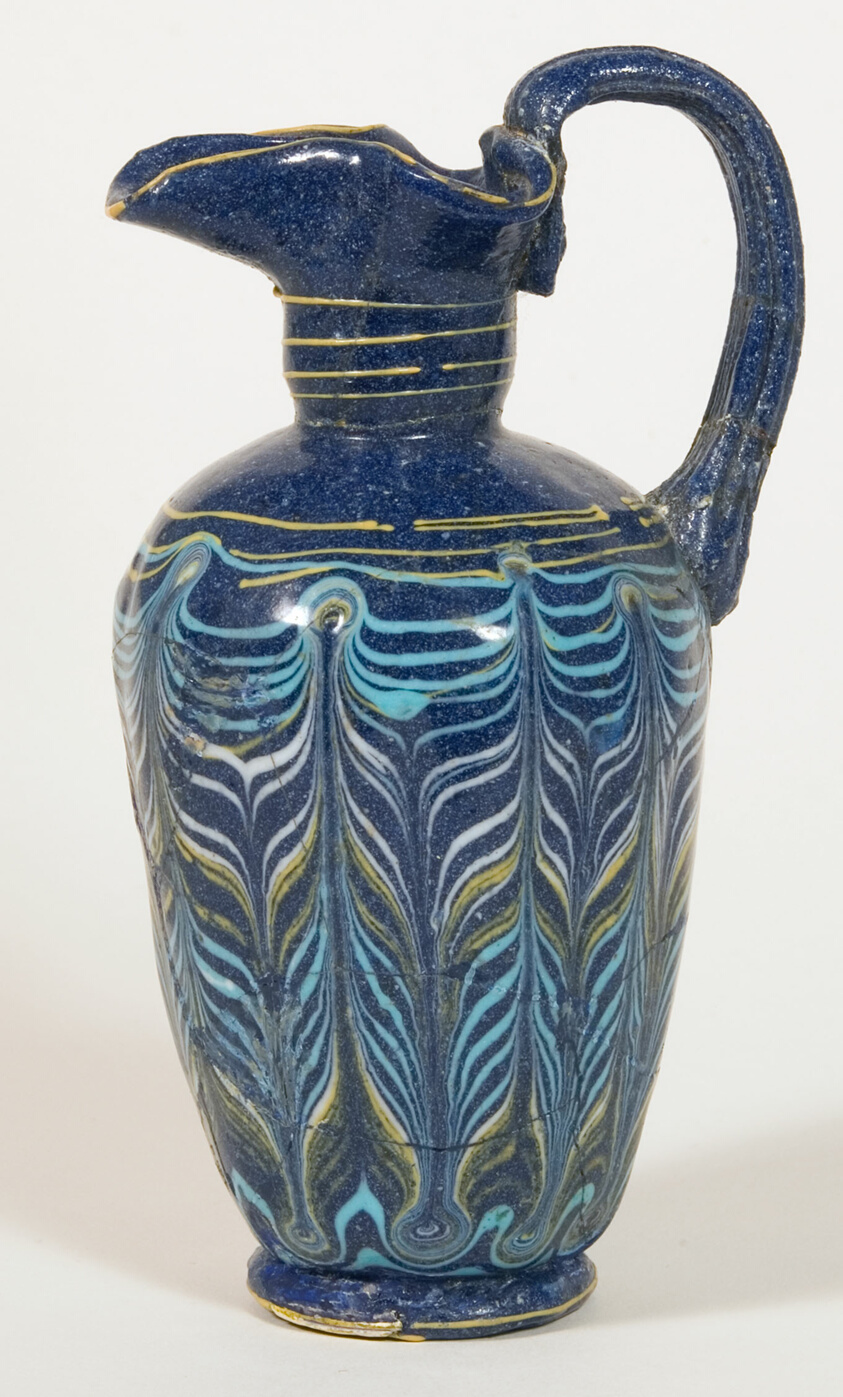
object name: Vessel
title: Oinochoe (Pitcher)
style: late period (egyptian)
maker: Eastern Mediterranean or Italian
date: mid–4th-early 3rd century BCE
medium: Glass, core-formed technique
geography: Eastern Mediterranean Region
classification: pitcher (vessel); glass; vessel; ancient art